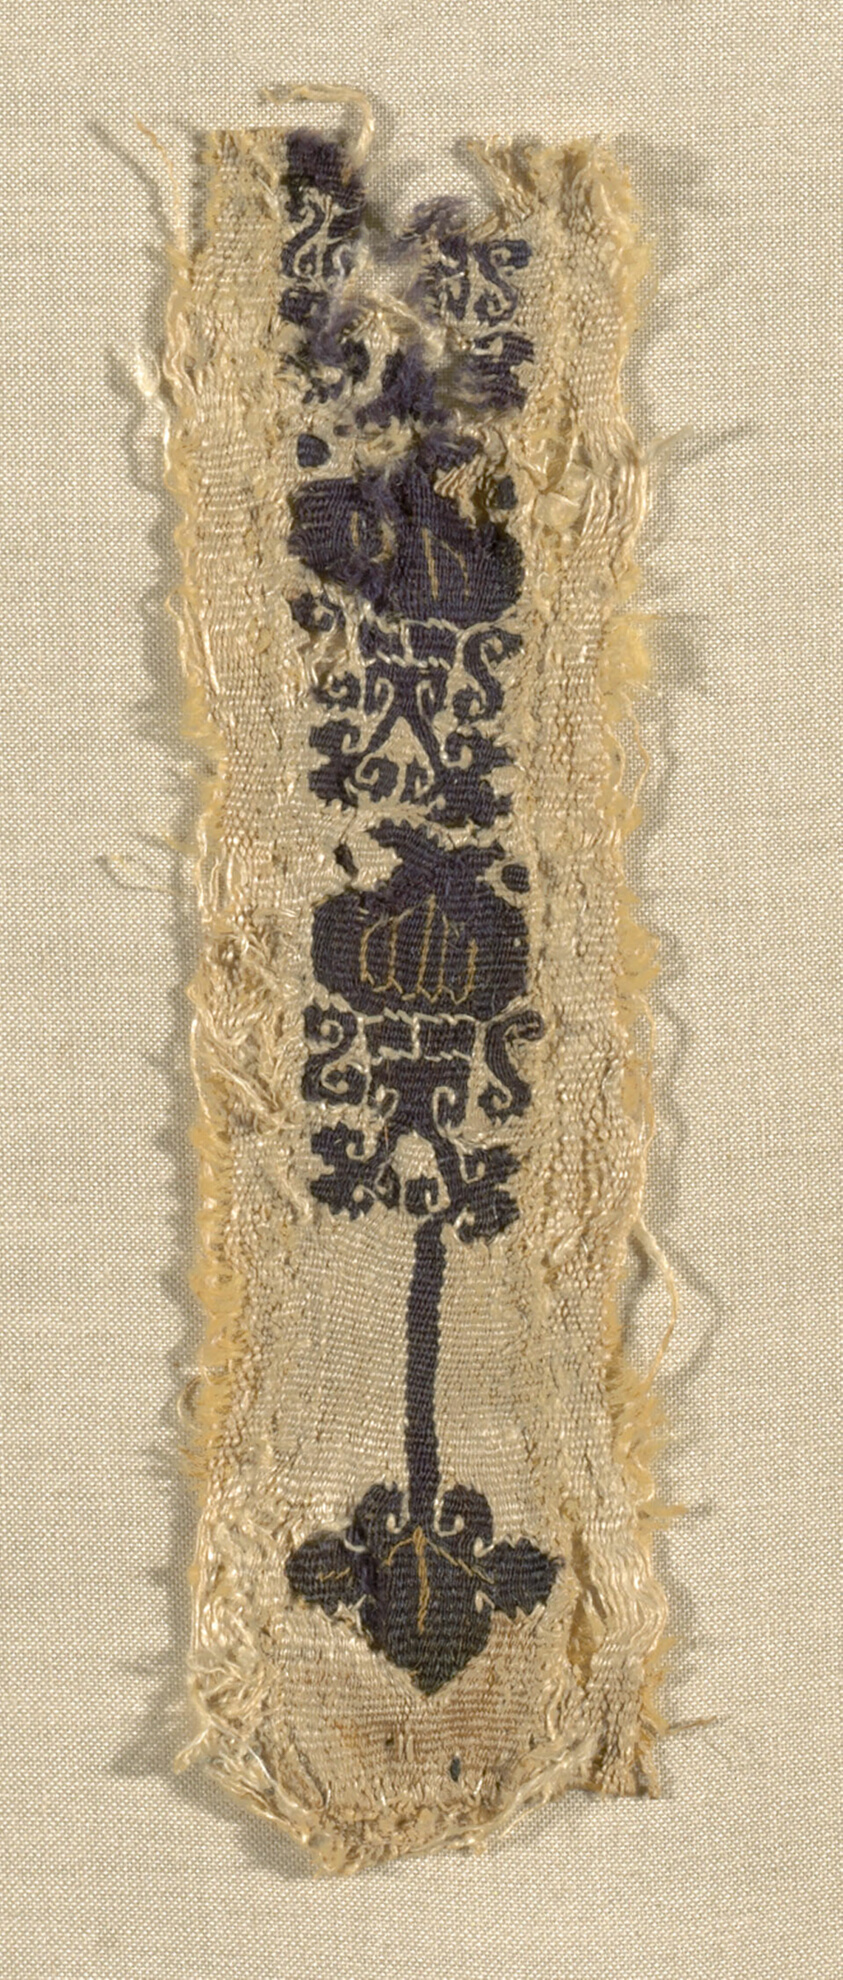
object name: Textile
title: Border (from a Tunic)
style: roman period (egyptian)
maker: Coptic (Egypt)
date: Roman period (30 B.C.– 641 A.D.), 4th century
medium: Linen and wool, slit tapestry weave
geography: Egypt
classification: textile; weaving